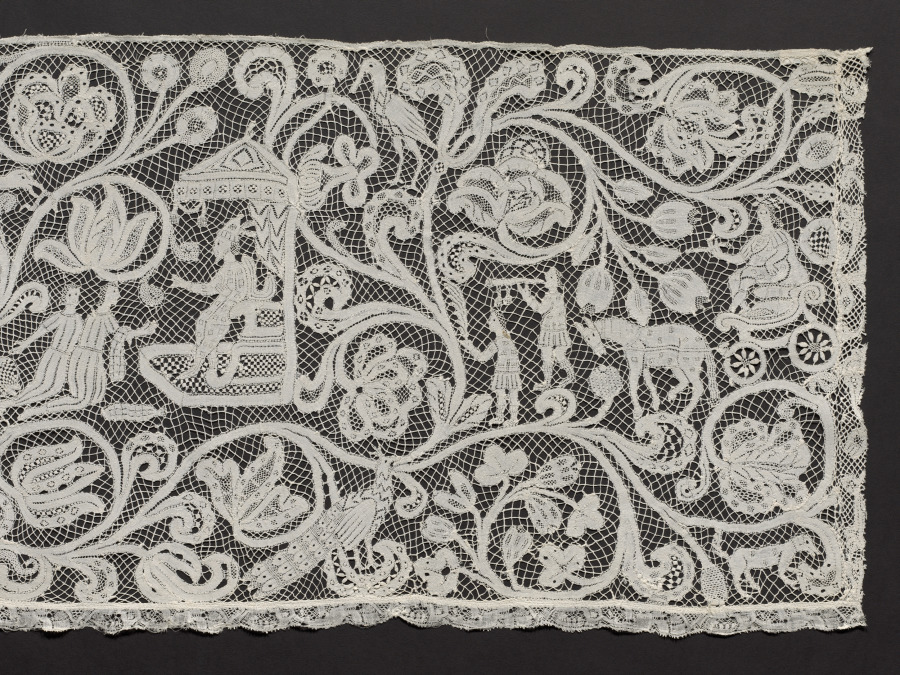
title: Lace Flounce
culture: Italy, Milan(?)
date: 1750–99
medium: Linen: bobbin lace (Punto di Milano)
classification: Lace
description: Being the most prestigious material, lace was used extensively by the 1600s for altar linen and for trimming priest’s albs, often incorporating finely rendered religious images amid blossoming vines. This alb flounce depicts scenes from the Old Testament story of Joseph, whose jealous brothers sold him to a caravan bound for Egypt. Joseph later interpreted dreams of the pharaoh, who made him ruler. When famine in Canaan caused Joseph’s ten brothers to travel to Egypt in search of food, they bowed down to him. After he revealed his identity, he forgave his brothers and God saved the family.